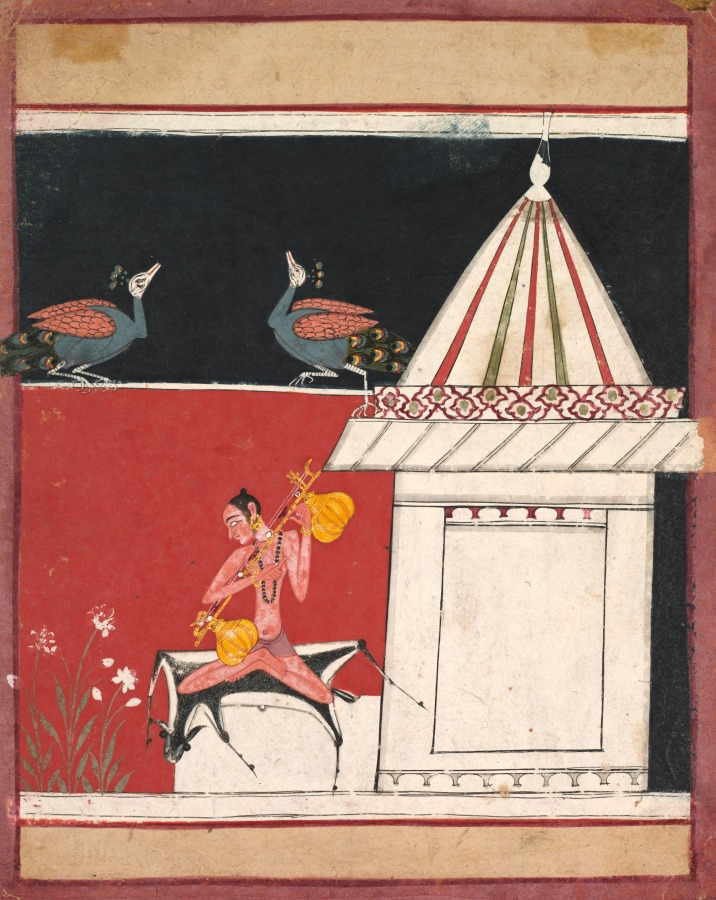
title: Kedara Ragini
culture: Central India, Rajasthan, Malwa school, 17th century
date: c. 1650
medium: ink and color on paper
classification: Painting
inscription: On reverse is seal of Datia state and seven-line inscription: "The heroine Kedara, longing for her lover, has assumed the character of a yogi and waits intently for his return. She has smeared ash all over her body, which is reduced to a skeleton. Absorbed in love, she sings her lord's praise. In this yogic garb, her body is terrifying and looks like a male body. She sees that night seems to be prolonged and anticipates dawn eagerly. Lovesickness is killing Kedara."1 (This translation is paraphrased from V. Dwivedi, 1968, p. 27; in his article, Dwivedi gives a longer translation in addition to contextual information.)